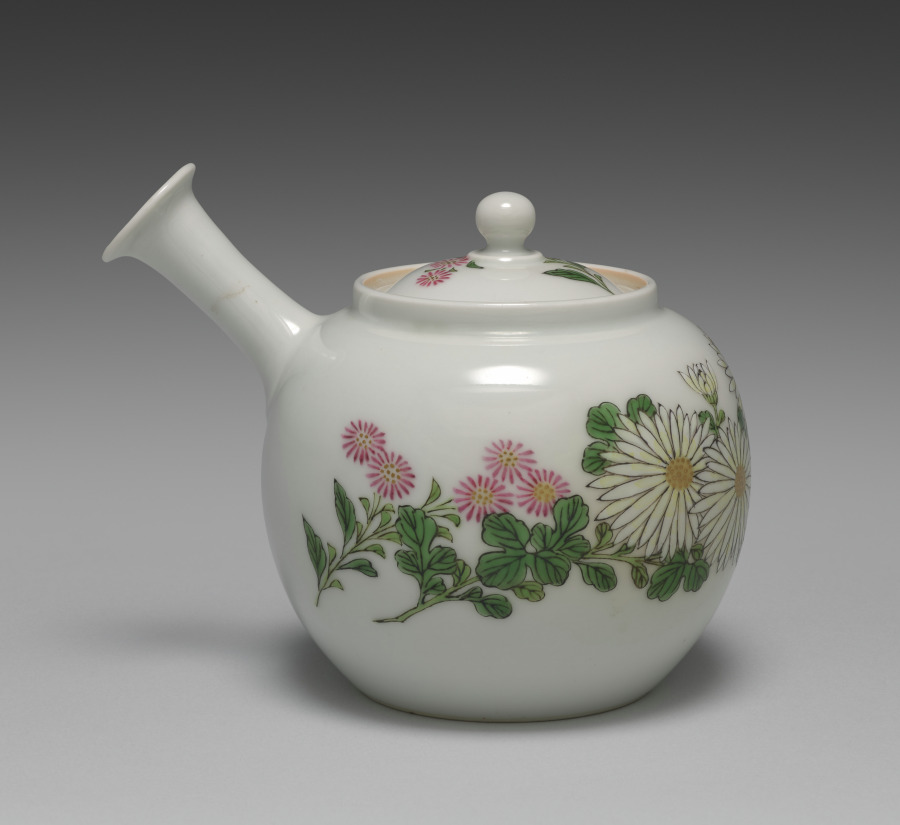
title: Teapot with Chrysanthemums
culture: Japan, Meiji period (1868–1912)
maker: Seifū Yohei III (Japanese, 1851–1914)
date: 1912–14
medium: Porcelian with overglaze enamel and gold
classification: Ceramic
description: This teapot with recessed lid has a bold, realistic design of pale yellow and white chrysanthemums rendered in overglaze color enamels and dotted gold centers. Black contour lines define the yellow and white flowers and their green stems and leaves. Small pink and purple chrysanthemums are rendered as simple motifs, their shapes defined in contrast to the white ground of the pot.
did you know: This side-handled teapot is designed for brewing and serving sencha.